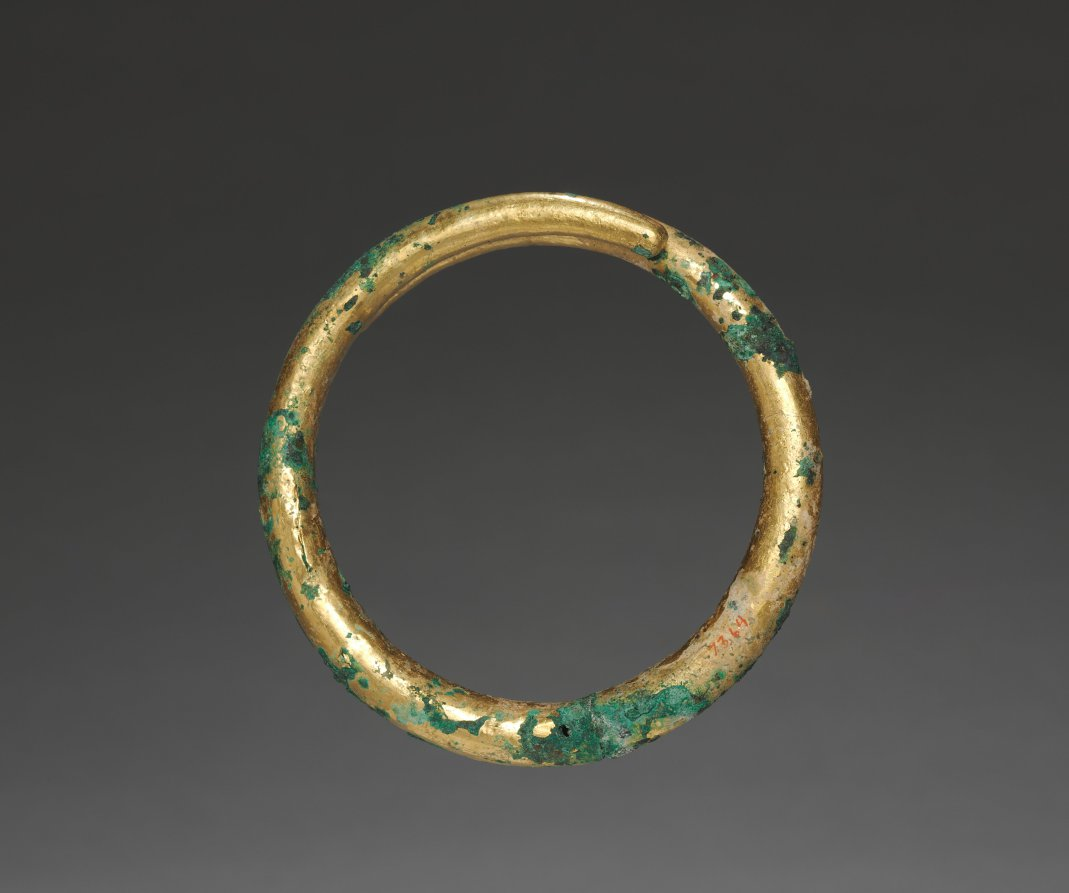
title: Bangle (1 of 2)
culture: India, Shunga period (185–78 BCE)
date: 185–72 BCE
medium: gilt bronze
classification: Jewelry